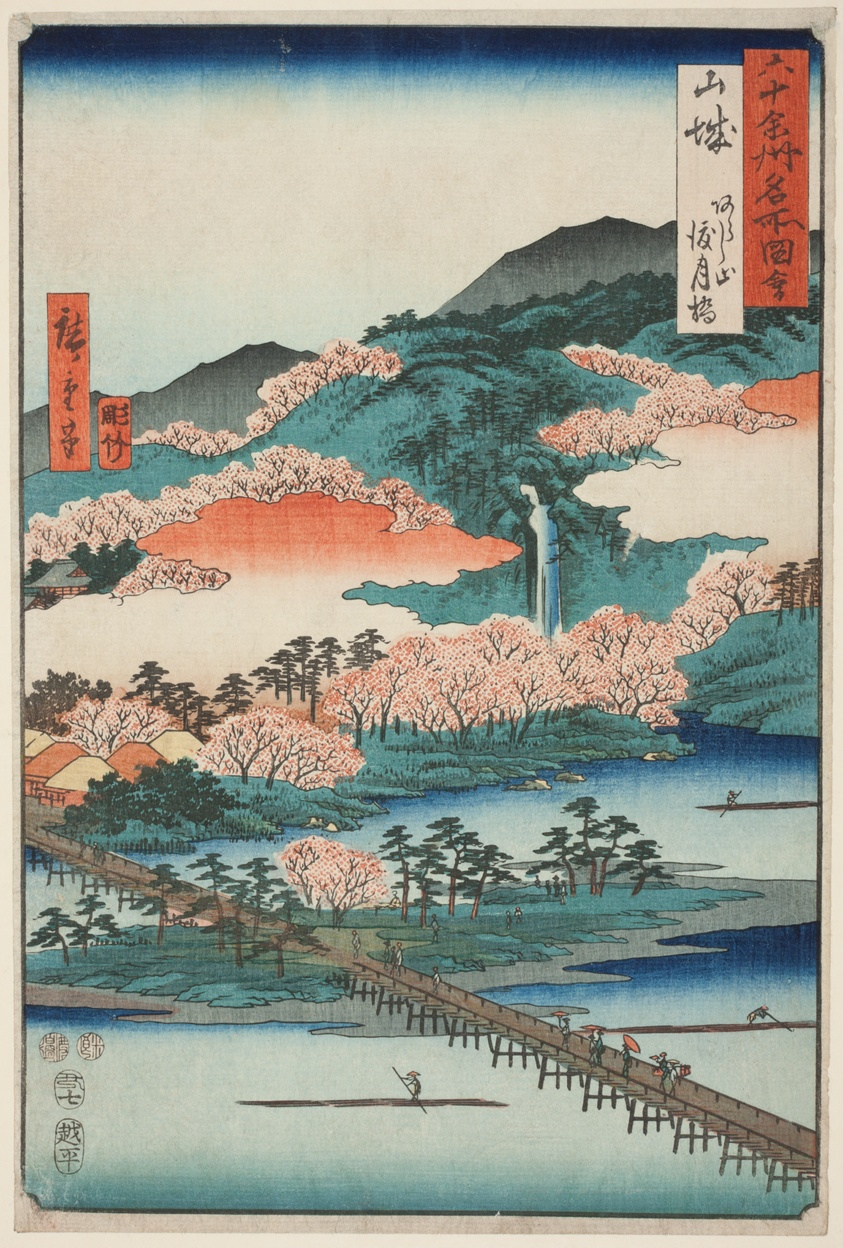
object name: Print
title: Yamashiro Province: The Togetsu Bridge in Mount Arashi (Yamashiro, Arashiyama Togetsukyo), from the series "Famous Places in the Sixty-odd Provinces (Rokujuyoshu meisho zue)"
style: Japanese (culture or style)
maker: Utagawa Hiroshige 歌川 広重; Japanese, 1797-1858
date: 1853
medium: Color woodblock print; ōban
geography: Japan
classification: woodblock print; print; asian art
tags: landscapes